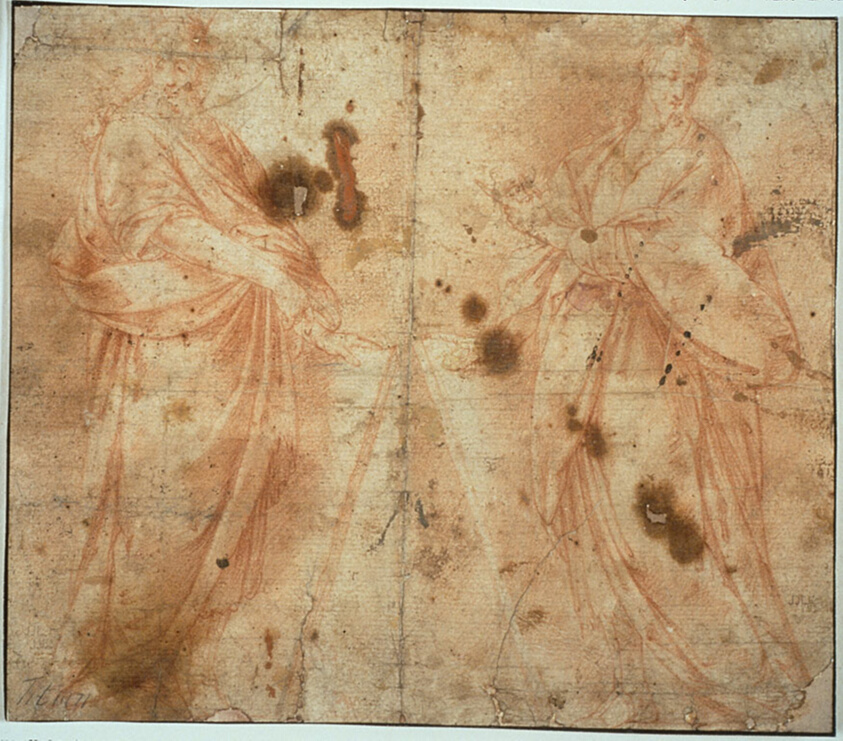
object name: Drawing and Watercolor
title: Saints Peter and Paul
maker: Artist unknown; Lombard, late 16th century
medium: Red chalk with stumping on cream laid paper, laid down on cream wove paper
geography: Italy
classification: chalk; drawings (visual works); prints and drawing